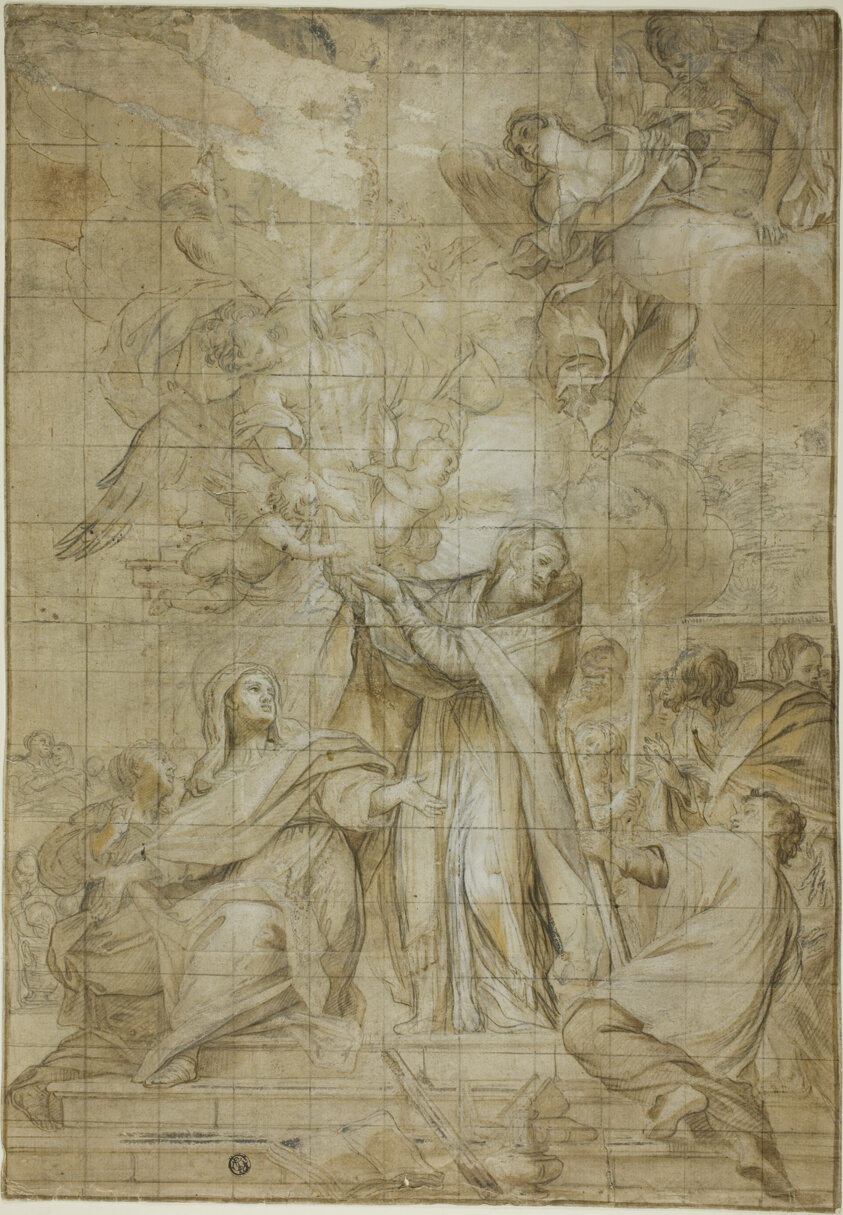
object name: Drawing and Watercolor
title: Vision of a Pope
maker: possibly Francesco Campora (Italian, c. 1693-1763)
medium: Pen and red brown ink with brush and brown wash and gouache, heightened with lead white (partly discolored), over black chalk, squared in black chalk, on ivory laid paper, partially laid down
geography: Italy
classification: graphite; drawings (visual works); prints and drawing